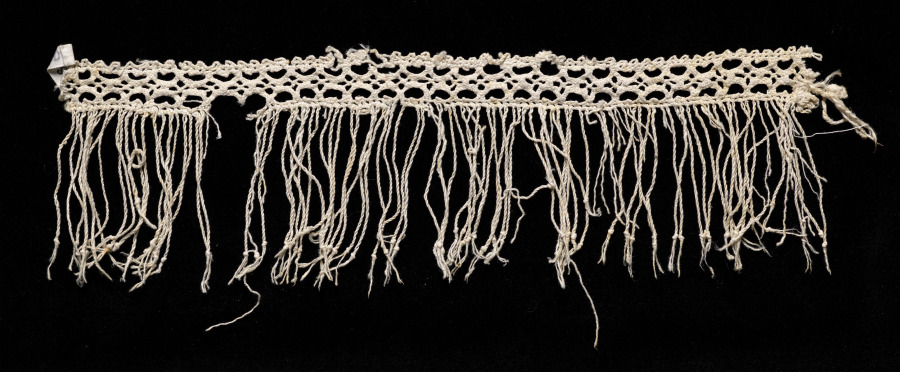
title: Lace Insertion with Fringe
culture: Italy, Venice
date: 1540–60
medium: Bobbin lace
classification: Lace